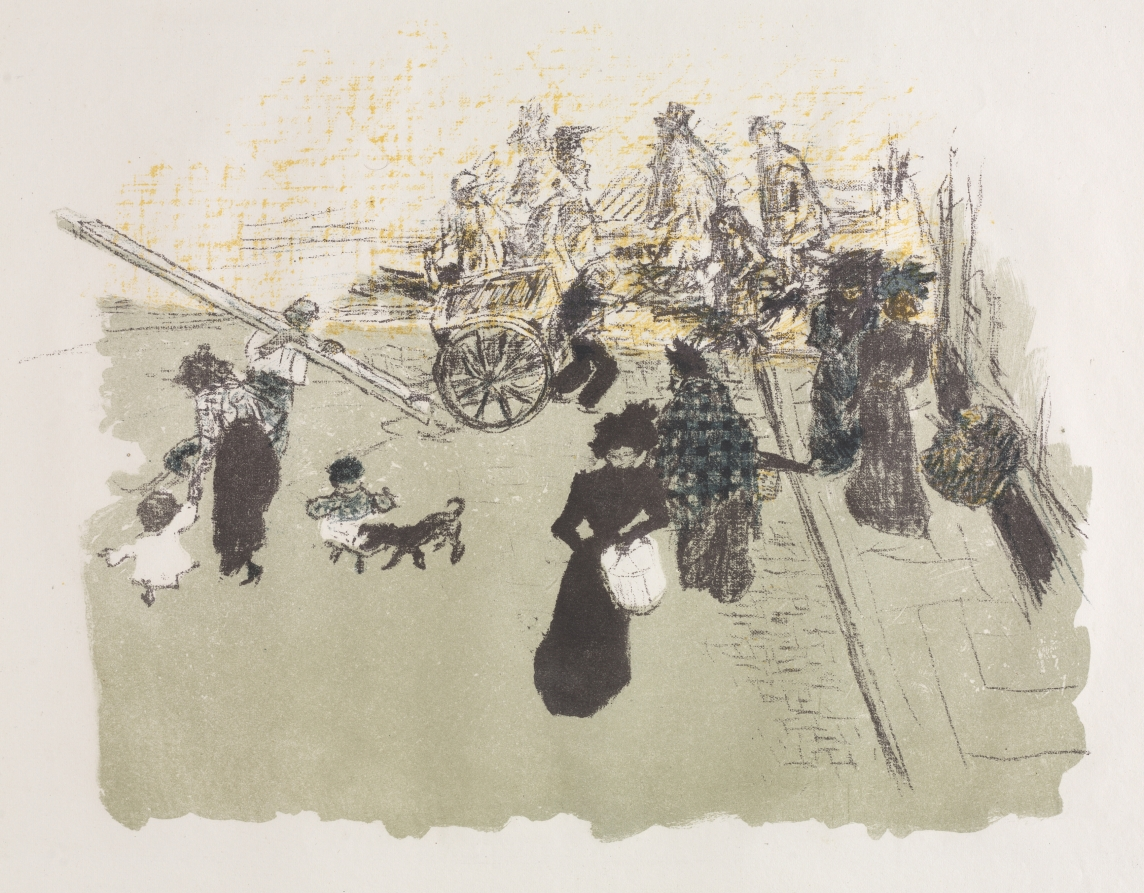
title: Street Corner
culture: France, 19th century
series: Some Scenes of Parisian Life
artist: Pierre Bonnard (French, 1867–1947)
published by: Published by Ambroise Vollard; Printed by Auguste Clot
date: 1899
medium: lithograph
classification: Print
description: This suite of color lithographs collected Pierre Bonnard’s observations of city life, ranging from animated street scenes to distant observations glimpsed from the artist’s Montmartre studio window. Rather than memorializing the famous monuments of Paris, Bonnard preferred to depict small neighborhood scenes populated by urbanites shopping and strolling and by vendors selling their wares. The setting for one of the prints is the second-largest public park in Paris, the Bois de Boulogne, which was a popular place for families to relax, stroll, and enjoy carriage rides around the lakes. Two prints are nocturnal scenes in which gaslight emanating from shop windows is reflected on the wet streets, creating passages of bright yellow in the otherwise dark compositions. Bonnard’s favorite subjects, such as the Parisienne—a young, fashionable, modern woman—as well as children and dogs, appear repeatedly throughout the prints in the suite.